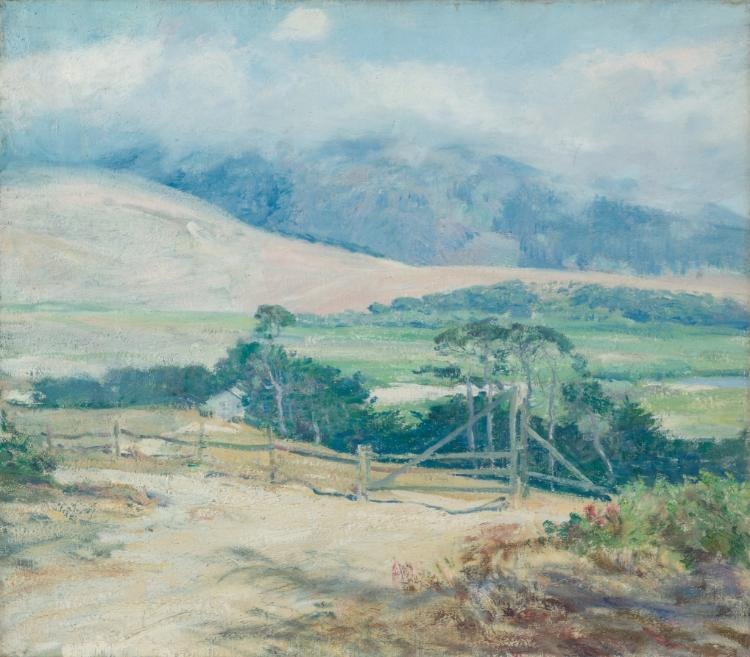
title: Carmel Hills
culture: America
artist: Guy Rose (American, 1867–1925)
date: c. 1918–1920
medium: oil on canvas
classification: Painting